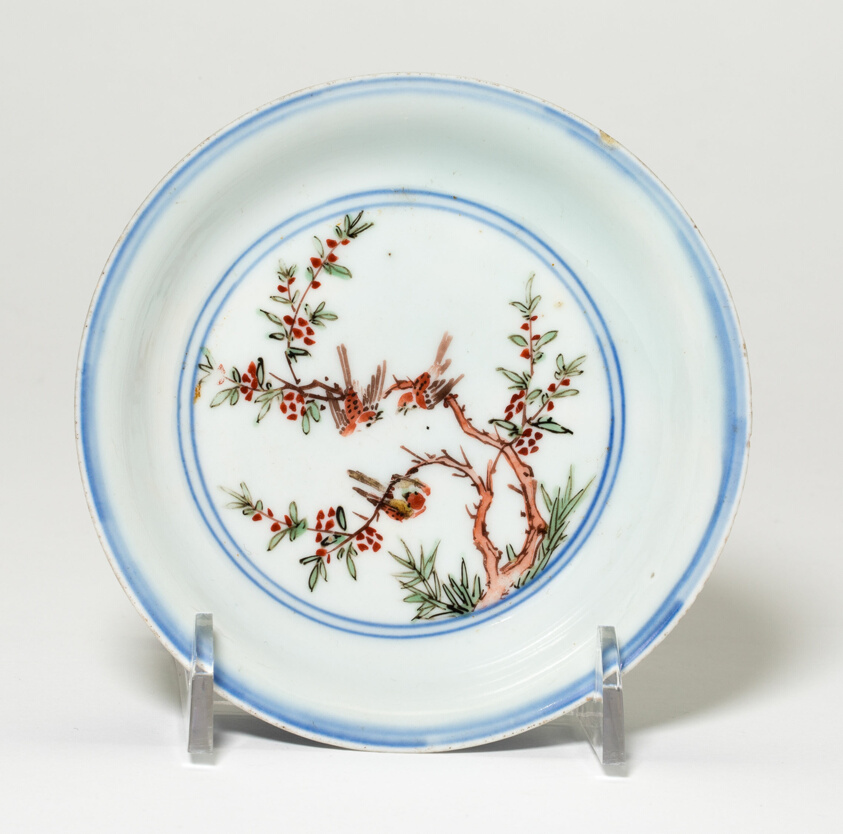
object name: Vessel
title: Dish with Birds on Flower Branches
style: Chinese (culture or style)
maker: China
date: Ming dynasty (1368–1644), Wanli reign mark (1563–1620)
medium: Porcelain painted in underglaze blue and overglaze enamels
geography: China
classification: dish (vessel); porcelain; asian art; ceramics; vessel